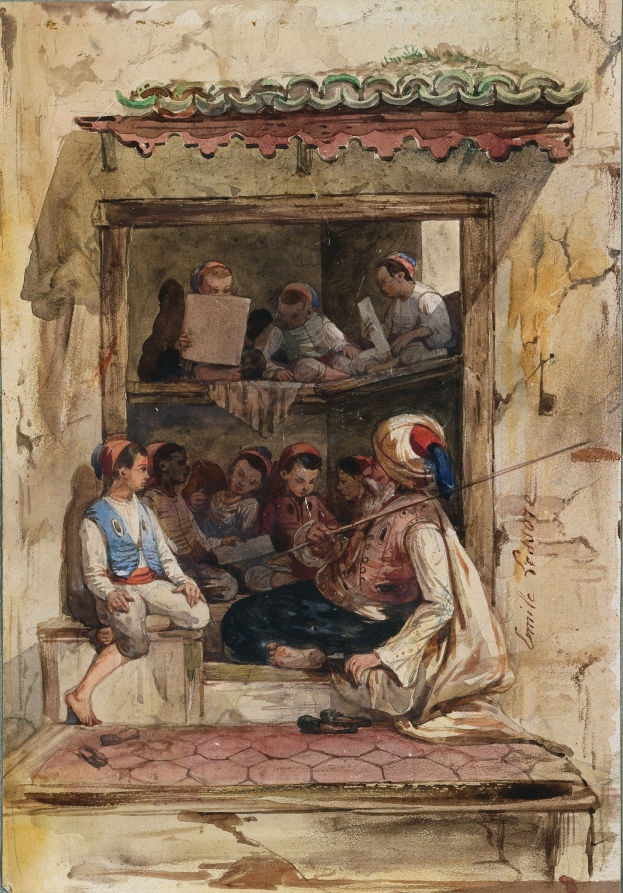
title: Boy's School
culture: France, 19th century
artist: Emile Aubert Lessoire (French, 1805–1876)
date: 19th Century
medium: watercolor with gouache over graphite, with traces of gold paint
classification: Drawing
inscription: signed, center right, in brown watercolor: Emile Lessore [sideways]